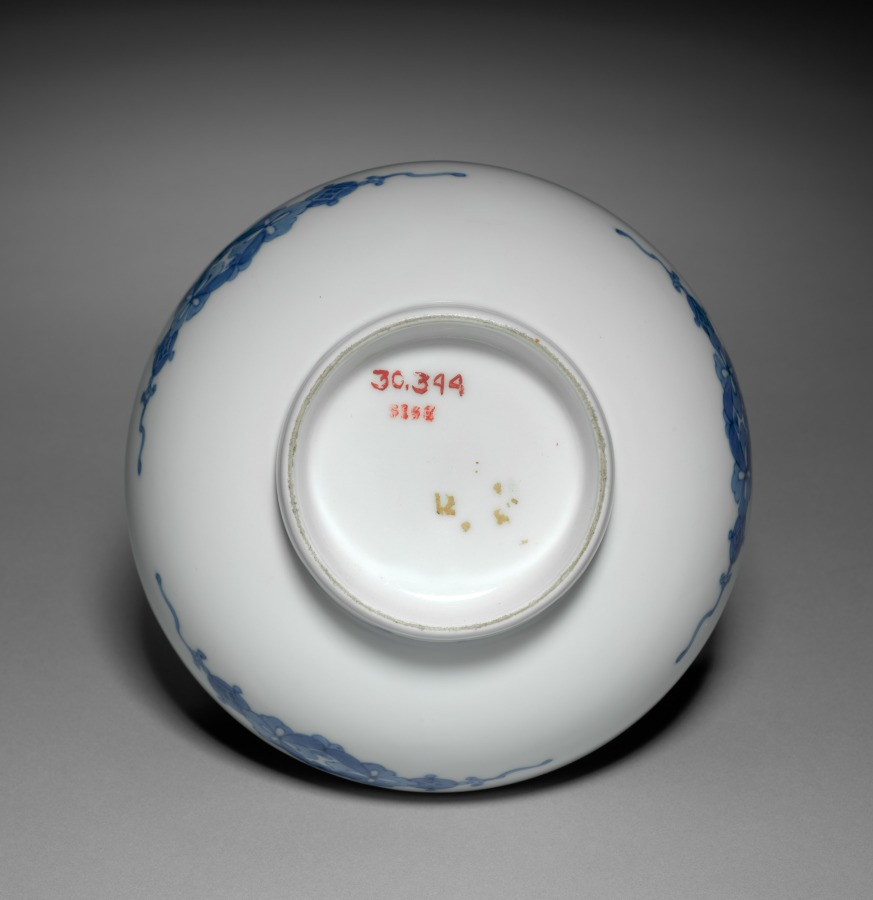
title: Dish with Hawk and Sparrows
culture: Japan, Meiji period (1868–1912) or Taishō period (1912–26)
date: c 1900– 1925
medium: Porcelain with underglaze blue decoration (Hizen ware)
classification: Ceramic